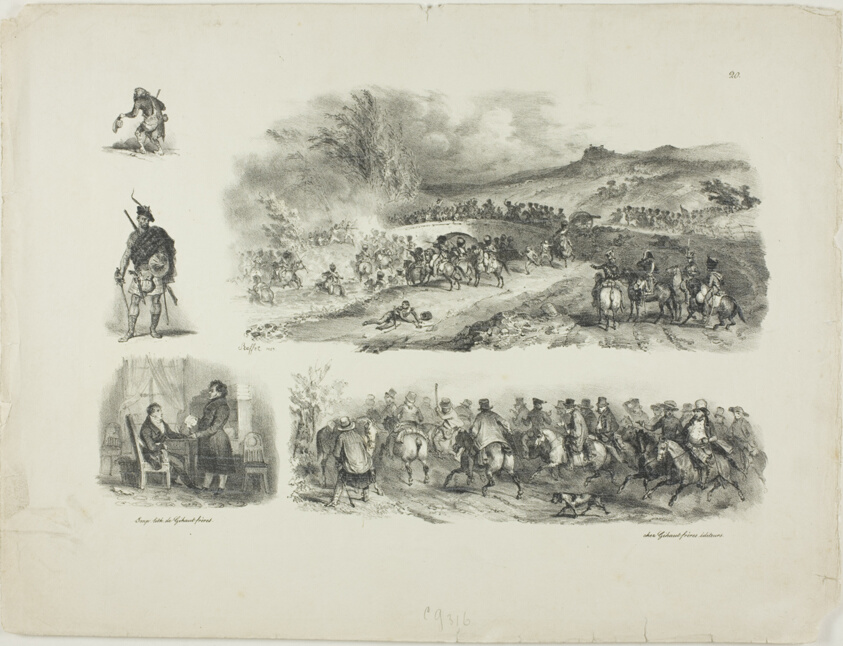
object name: Print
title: Sheet of Sketches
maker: Denis Auguste Marie Raffet (French, 1804-1860); published by Chez Gihaut Frères (French, 19th century)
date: 1829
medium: Lithograph in black on ivory wove paper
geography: France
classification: lithograph; print; prints and drawing